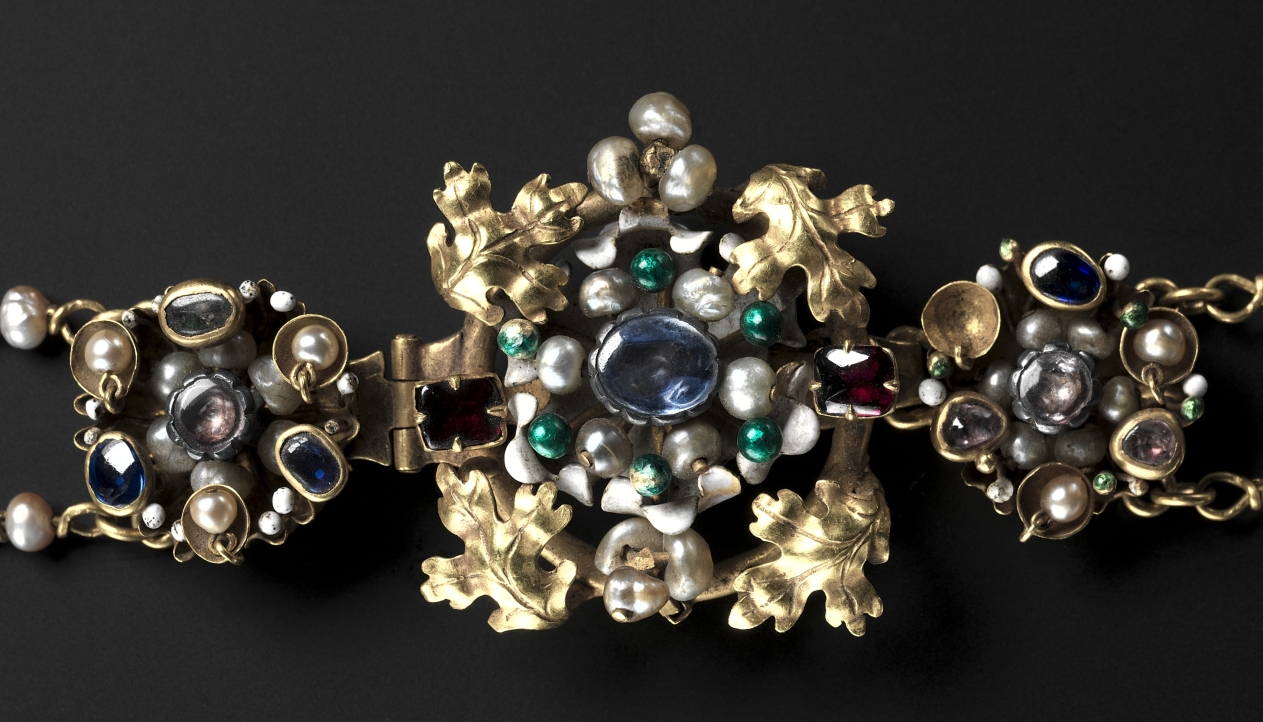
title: Twelve Medallions Mounted as a Necklace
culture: France, Paris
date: c. 1400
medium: enameled gold, precious stones, and pearls; some later additions with modern chain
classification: Jewelry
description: These medallions, which have loops on the backs, must have originally been sewn onto a garment or, more likely, a woman’s headpiece. In spite of the modern chain to which they are now attached, the medallions are unique items of feminine apparel from around 1400. Such items would have been well known at the courts of the Valois in Paris, Bourges, and Dijon. The central medallion with a “white lady” is enameled “in the round”––a new Parisian technique for enameling irregular or three-dimensional surfaces. Such white lady medallions are described in inventories of the period